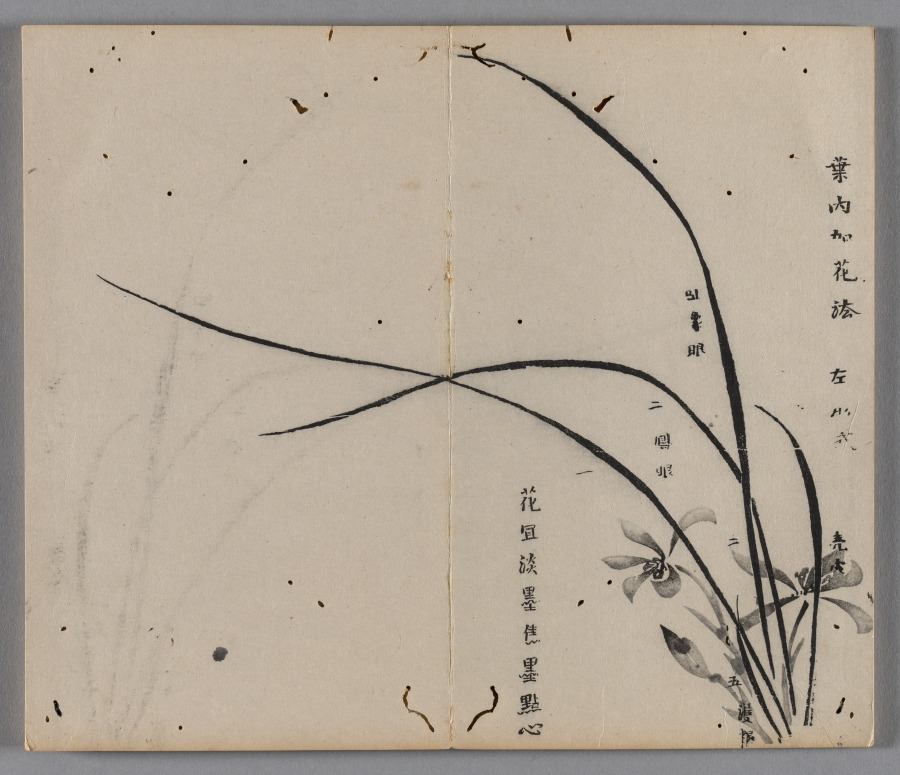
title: Ten Bamboo Studio Painting and Calligraphy Handbook (Shizhuzhai shuhua pu): Orchids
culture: China, Qing dynasty (1644-1911)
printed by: Hu Zhengyan (Chinese, c. 1584–1674)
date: 1633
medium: Woodblock-printed book; ink and colors on paper; first edition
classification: Print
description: Color printing reached a level of perfection in the early 1600s, as seen in this Ten Bamboo Studio Collection of Calligraphy and Painting and the Mustard Seed Garden Manual of Painting (printed 1679 and 1701). The painterly quality, precision in registering (aligning) the woodblocks, and harmonious colors made them the most successful color print editions in Chinese history. Both editions were printed and compiled in Nanjing, spread nationwide, and had a great impact on the arts in Japan and Korea.